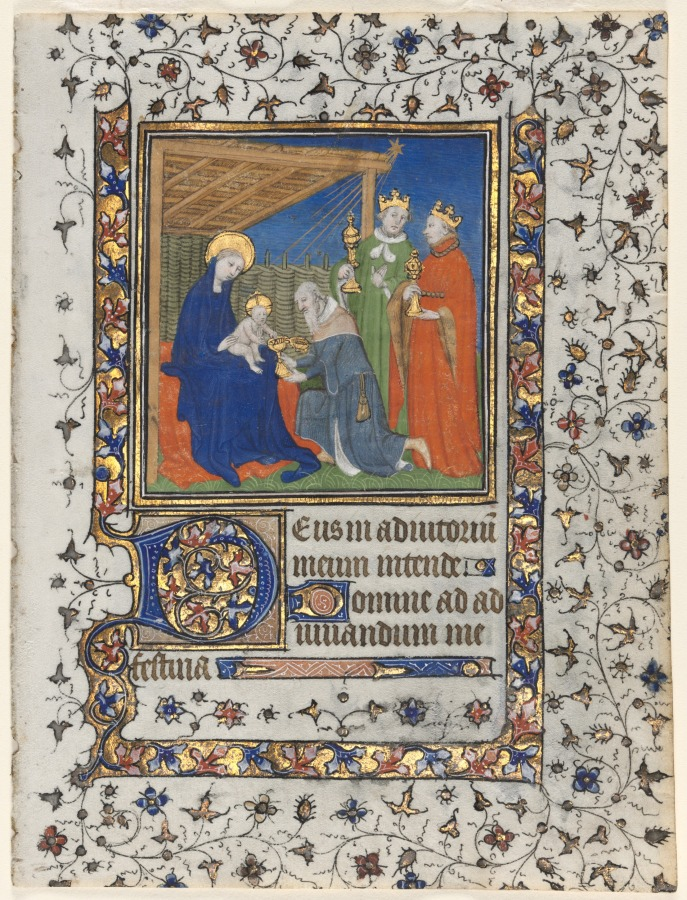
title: Pair of Bifolio from a Book of Hours: Adoration of the Magi and Coronation of the Virgin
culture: France, Paris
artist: workshop of Boucicaut Master (French, Paris, active about 1410–25)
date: c. 1415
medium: ink, tempera, and gold on vellum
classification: Manuscript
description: Books of hours were devotional books popular in the Middle Ages. Meant for laypeople, or those not in the clergy they were used at home and contained daily prayers as well as prayers for specific occasions, such as death, plague, warfare, travel, or bad weather. The heart of every book of hours is the Hours of the Virgin. With this set of prayers, the reader asked the Virgin Mary to intercede on their behalf. The Adoration of the Magi opens sext, the sixth hour of the day or noon. The Coronation of the Virgin begins compline, which is before retiring.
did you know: All books of hours contain the same basic sections and were highly customizable.